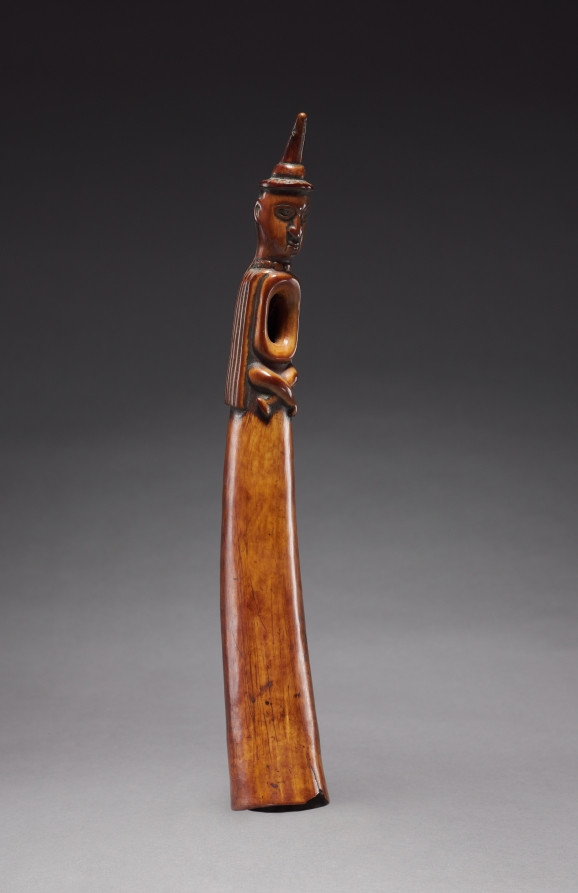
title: Oliphant (Side-Blown Trumpet)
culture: Africa, Central Africa, Democratic Republic of Congo (most likely), Cabinda, or Republic of the Congo, probably Yombe-style maker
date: late 1800s–early 1900s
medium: Ivory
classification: Musical Instrument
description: Side-blown trumpets were used on various occasions, and ivory examples seem to have been reserved for more solemn circumstances, such as funerals. As the mouthpiece is located on the inner curve, the person who played this instrument held it horizontally. A seated male Yombe ruler wearing a shell necklace and a European-style cloak and hat is carved on top. His blended dress shows how Yombe people (a Kongo sub-group) selectively adopted elements of foreign dress to wear with their own fashions.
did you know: Kongo Kingdom rulers sent ornately carved large side-blown trumpets to Europe as diplomatic gifts during the sixteenth century.